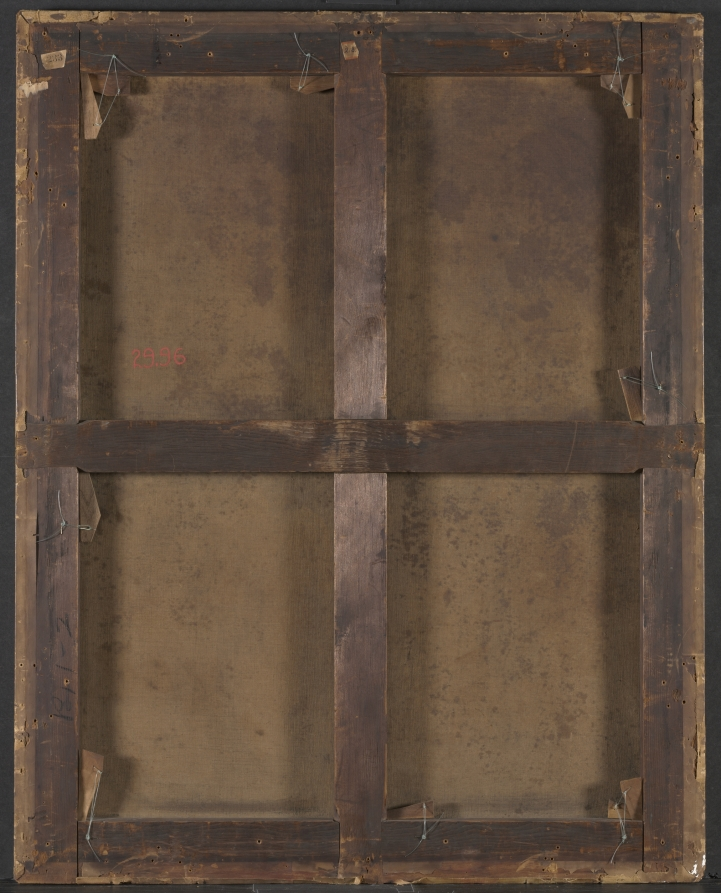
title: The Miracles of Saint James the Greater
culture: France, 18th century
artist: Noël Nicolas Coypel (French, 1690–1734)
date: 1726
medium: oil on canvas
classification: Painting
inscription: Signed lower left: "N. Coypel / 1726"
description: Noël Nicolas Coypel combined two stories associated with Saint James the Greater, one of the twelve apostles of Christ. In the foreground is the magician Hermogenes, begging forgiveness. Hermogenes had cast a spell on James, but the saint turned the curse back on him. When James offered to protect Hermogenes against the demons assaulting him, the magician cast aside his pagan texts in favor of Christianity. According to the second legend, James miraculously cured a paralytic man (in the middle ground at right), thereby averting his own execution and causing the prosecutor to convert. Although this painting is relatively small, the clear composition, grand architectural setting, and dignified and expressive poses of the figures endow it with monumental presence.